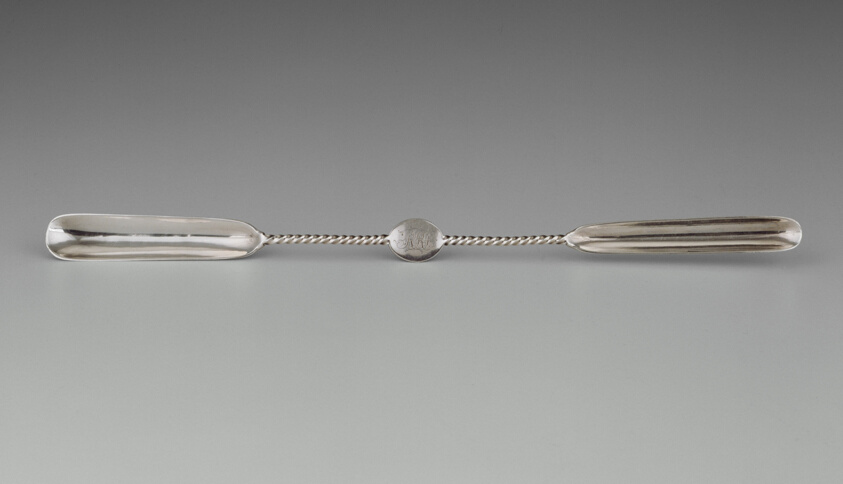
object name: Metalwork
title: Marrow Scoop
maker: Gale & Willis; American, 1859–1862; New York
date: 1859–62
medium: Silver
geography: New York City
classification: utensil; silver; american decorative arts; american arts; decorative arts